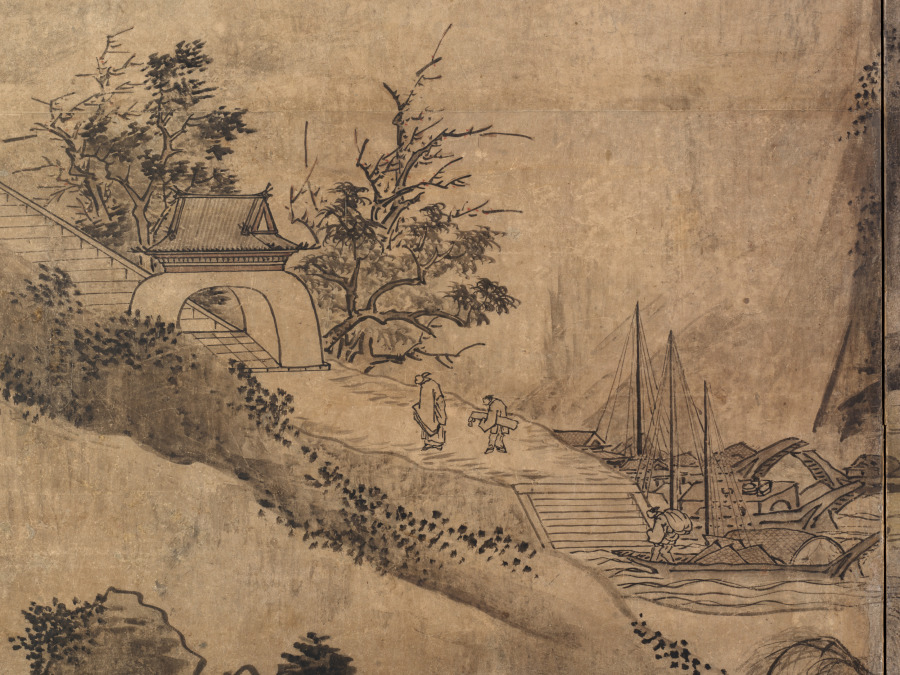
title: Landscape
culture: Japan, Muromachi period (1392–1573)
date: 1550–99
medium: One of a pair of six-panel folding screens; ink and color on paper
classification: Painting